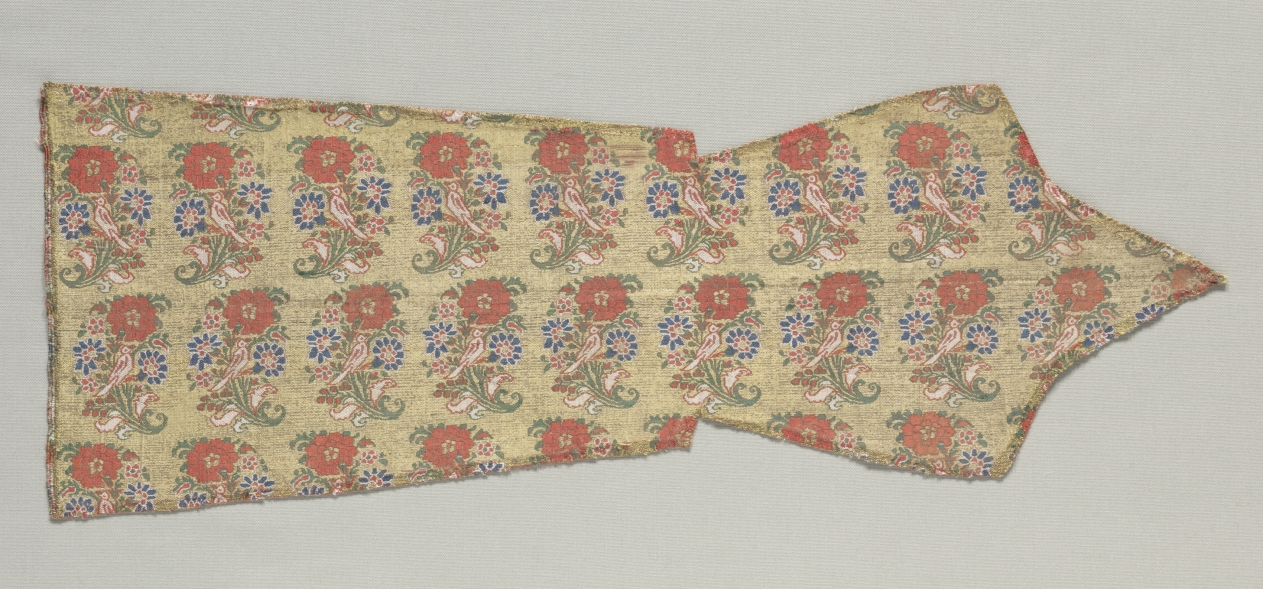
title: Sleeve with birds in blossoming bushes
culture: Iran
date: 1700s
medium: taqueté: silk and gilt-metal thread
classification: Textile